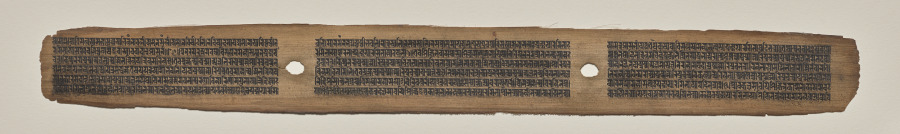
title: Text, folio 3 (verso), from a Manuscript of the Perfection of Wisdom in Eight Thousand Lines (Ashtasahasrika Prajnaparamita-sutra)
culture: Eastern India, Bihar, Vikramashila Monastery. Painting: Nepal, Kathmandu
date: Sunday, September 14, 1119 (year 239 of the Newar Samvat in the month of Ashvina)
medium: gum tempera and ink on palm leaves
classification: Painting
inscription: bodhisattvabhūmāv api śikṣitukāmena iyameva prajñāpāramitā śrotavyā udgrahītavyā dhārayitavyā vācayitavyā paryavāptavyā pravartayitavyā / ihaiva prajñāpāramitāyāmupāyakauśalyasamanvāgatena sarvabodhisattvadharmasamudāgamāya yogaḥ karaṇīyaḥ / tatkasya hetoḥ? ihaiva hi prajñāpāramitāyāṃ vistareṇa sarvabodhisattvadharmā upadiṣṭāḥ, yatra bodhisattvena mahāsattvena śikṣitavyaṃ yogamāpattavyam / anuttarāyām api samyaksaṃbodhau śikṣitukāmena iyameva prajñāpāramitā śrotavyā udgrahītavyā dhārayitavyā vācayitavyā paryavāptavyā pravartayitavyā / ihaiva prajñāpāramitāyāmupāyakauśalyasamanvāgatena sarvabuddhadharmasamudāgamāya yogaḥ karaṇīyaḥ / tatkasya hetoḥ? ihaiva hi prajñāpāramitāyāṃ vistareṇa sarvabuddha dharmā upadiṣṭāḥ, yatra bodhisattvena mahāsattvena śikṣitavyaṃ yogamāpattavyam // atha khalvāyuṣmān subhūtirbhagavantametadavocat - yo 'haṃ bhagavan etadeva bodhisattvanāmadheyaṃ na vedmi nopalabhe na samanupaśyāmi, prajñāpāramitām api na vedmi nopalabhe na samanupaśyāmi / so 'haṃ bhagavan etadeva bodhisattvanāmadheyamavindan anupalabhamāno 'samanupaśyan prajñāpāramitām api avindan anupalabhamāno 'samanupaśyan katamaṃ bodhisattvaṃ katamasyāṃ prajñāpāramitāyāmavavadiṣyāmi anuśāsiṣyāmi? etadeva bhagavan kaukṛtyaṃ syāt, yo 'haṃ vastvavindan anupalabhamāno 'samanupaśyan nāmadheyamātreṇa āyavyayaṃ kuryāṃ yaduta bodhisattva iti / api tu khalu punarbhagavaṃstad api nāmadheyaṃ na sthitaṃ nāsthitaṃ na viṣṭhitaṃ nāviṣṭhitam / tatkasya hetoḥ? avidyamānatvena tasya nāmadheyasya / evaṃ tannāmadheyaṃ na sthitaṃ nāsthitaṃ na viṣṭhitaṃ nāviṣṭhitam / sacedbodhisattvasya mahāsattvasya evaṃ gambhīrāyāṃ prajñāpāramitāyāṃ bhāṣyamāṇāyāṃ deśyamānāyāmupadiśyamānāyāṃ cittaṃ nāvalīyate na saṃlīyate na viṣīdati na viṣādamāpadyate, nāsya vipṛṣṭhībhavati mānasam, na bhagnapṛṣṭhībhavati, notrasyati na saṃtrasyati na saṃtrāsamāpadyate / adhimucyate 'dhyāśayena avirahito bodhisattvo mahāsattvaḥ prajñāpāramitāyā veditavyaḥ, sthito 'vinivartanīyāyāṃ bodhisattvabhūmau, susthito 'sthānayogena / punaraparaṃ bhagavan bodhisattvena mahāsattvena prajñāpār[amitāyāṃ]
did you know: The Sanskrit text reads left-to-right across the entirety of the page before starting a new line.